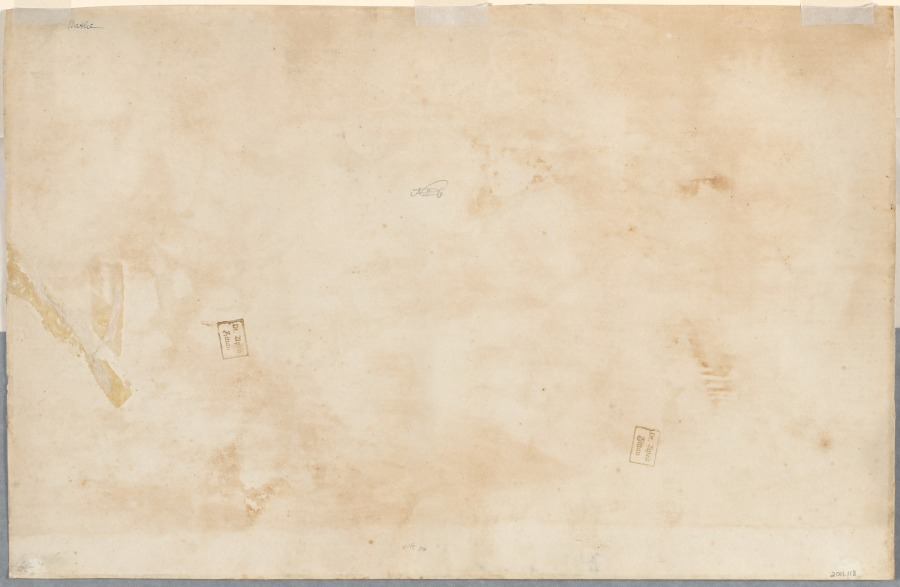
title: A Beech Wood with a Resting Traveler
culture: Germany, 19th century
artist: Christoph Nathe (German, 1753–1806)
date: 1803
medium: brown and gray wash with extensive point of brush work, with traces of black chalk underdrawing on ivory wove paper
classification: Drawing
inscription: Inscribed lower right in brown watercolor:" CN 1823" Verso: collector's stamp, in light brown ink: "Dr. Apelt / Zittau enclosed in a square [not in Lugt]" in graphite: "No. 6 [crossed out]" in blue ink: "Nathe"